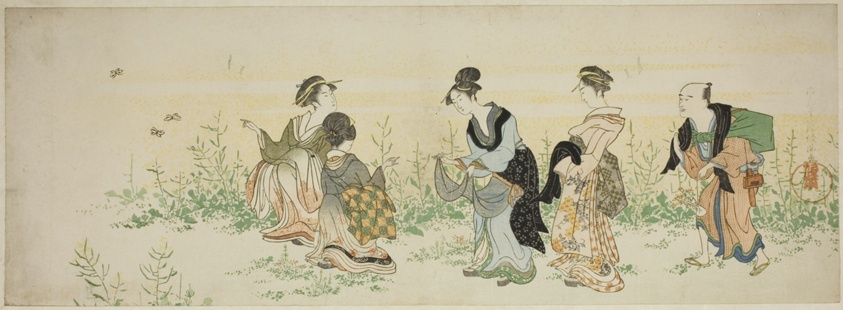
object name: Print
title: Gathering spring flowers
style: Japanese (culture or style)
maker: Kubo Shunman (Japanese, 1757–1820)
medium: Color woodblock print; nagaban, surimono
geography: Japan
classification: woodblock print; print; asian art